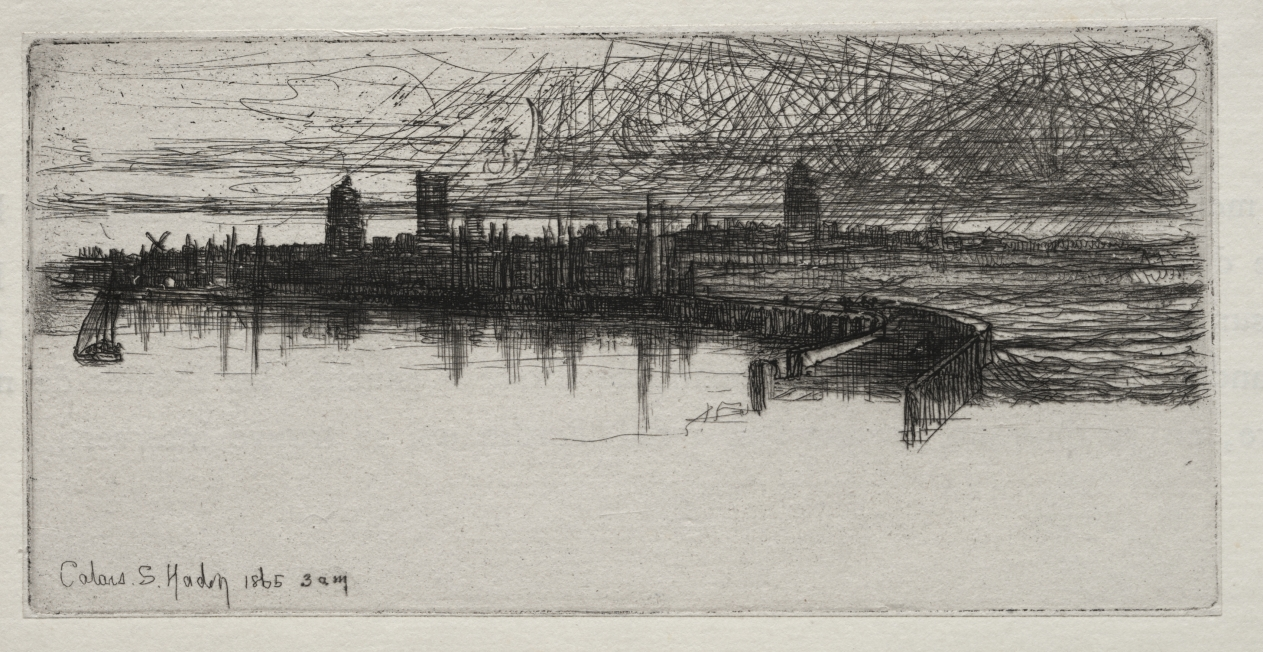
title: Little Calais Pier, 1865, 3 A.M.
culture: England, 19th century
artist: Francis Seymour Haden (British, 1818–1910)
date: 1865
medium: etching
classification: Print